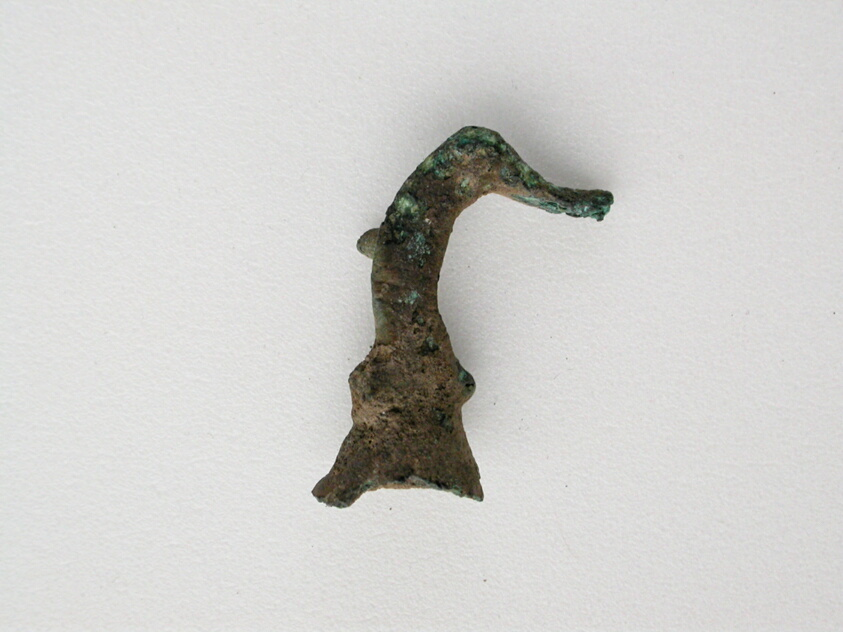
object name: Decorative Arts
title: Bird Head Fragment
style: geometric, ancient, greek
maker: Greek; Thessaly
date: Geometric Period (800–600 BCE)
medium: Bronze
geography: Greece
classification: votive offering; ex-voto; decorative arts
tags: bird